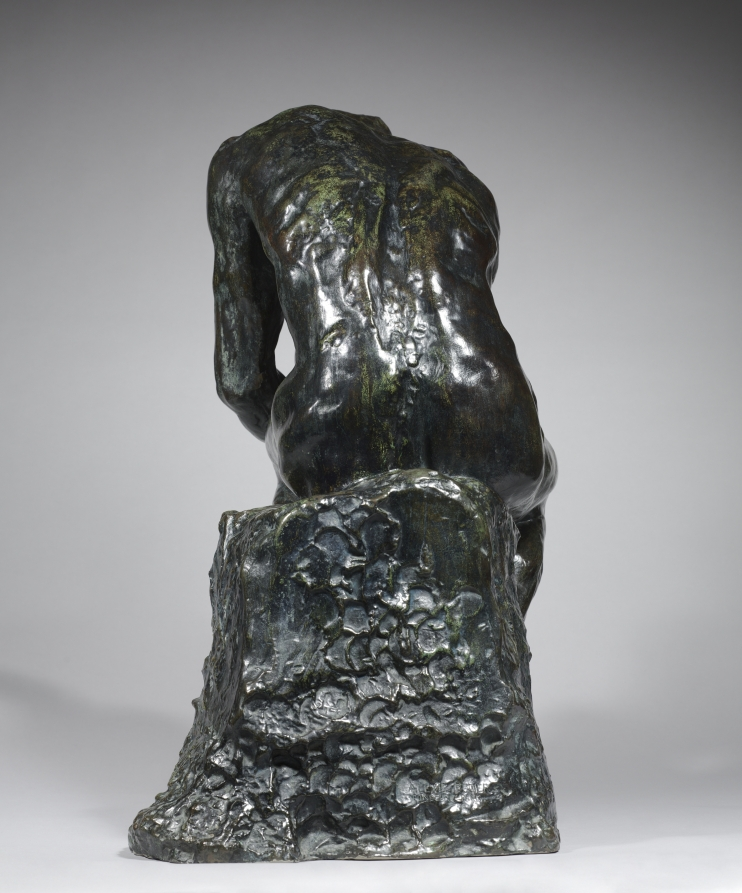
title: The Thinker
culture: France, 19th century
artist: Auguste Rodin (French, 1840–1917)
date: c. 1880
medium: bronze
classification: Sculpture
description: Rodin originally conceived The Thinker as a depiction of the Italian poet Dante Alighieri (1265–1321) sitting in the upper center of a monumental sculptural doorway titled The Gates of Hell (below). Inspired by Dante’s description of a journey through the underworld in his epic poem The Divine Comedy (about 1320), The Thinker contemplates mankind’s fate while gazing at a host of damned figures writhing in anguish below. Stripped of clothing, the figure’s rippling muscles convey an inner, animating life force symbolic of mental activity or creative effort. The figure leans forward, as if ready to spring from his perch, yet seems simultaneously caught in the inaction of deep thought. Rodin produced independent versions of The Thinker, first in this original size and later in a monumental version.